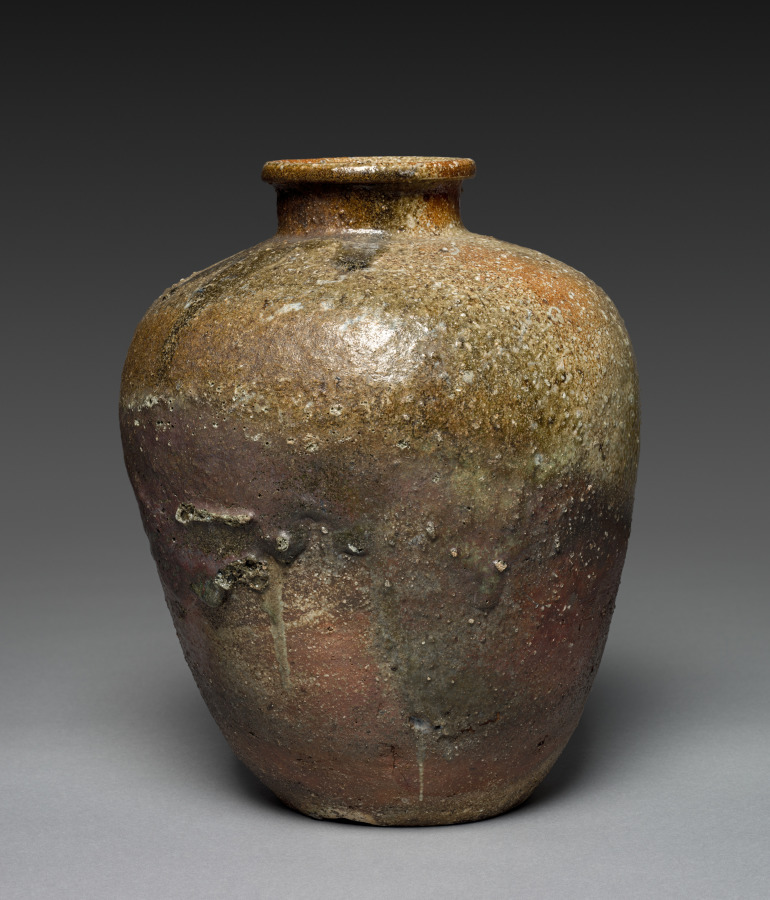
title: Storage Jar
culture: Japan, Muromachi period (1392–1573)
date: 1500s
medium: Stoneware with natural ash glaze (Shigaraki ware)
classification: Ceramic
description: Shigaraki ware is produced in the Shigaraki area of Shiga prefecture to the east of Kyoto in the Kansai region. The clay from Shigaraki has a warm orange color. When fired in an anagama kiln, a type of wood-fired kiln that uses the oxidization process, the free flow of air allows for the appearance of the ash and mineral glazes that characterize the works. Shigaraki storage jars like this one, a tsubo, have been popular for storing tea leaves since the Muromachi period.